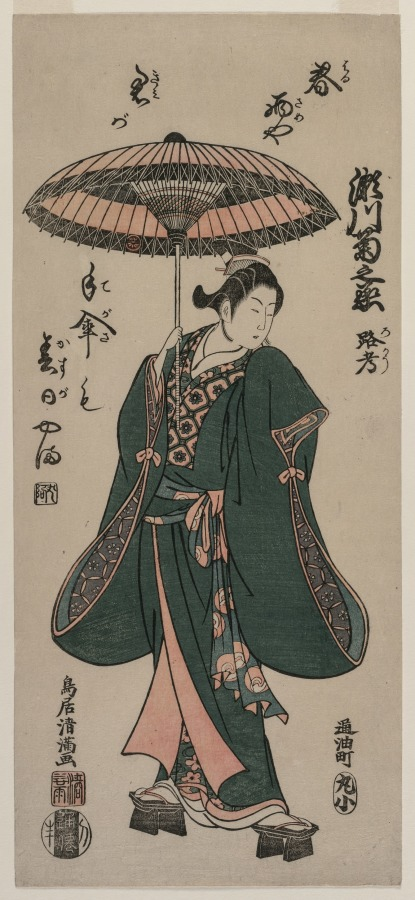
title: Segawa Kikunojo (Roko) Holding an Umbrella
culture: Japan, Edo period (1615–1868)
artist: Torii Kiyomitsu (Japanese, 1735–1785)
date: c. early 1760s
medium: color woodblock print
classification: Print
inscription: Signature: Torii Kiyomitsu ga Artist Seal: Kiyomitsu Publisher: Maruya Kohei (Toriaburacho, Maruko) Engraver: Tsusen kan (?)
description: The poem on the print can be translated as "in the spring shower shall I know his umbrella."